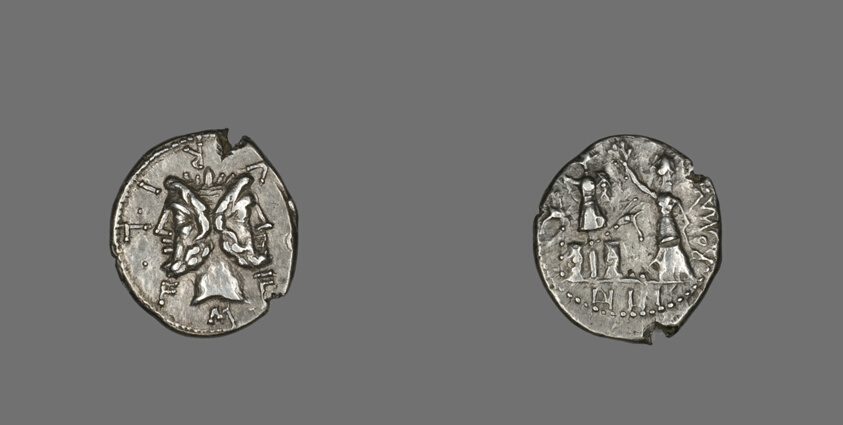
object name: Coin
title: Denarius (Coin) Depicting the God Janus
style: republic period, ancient, roman (ancient, style or period)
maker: Roman, minted in Rome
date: 119 BCE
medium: Silver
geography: Italy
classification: coin; ancient art; struck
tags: mythological figures